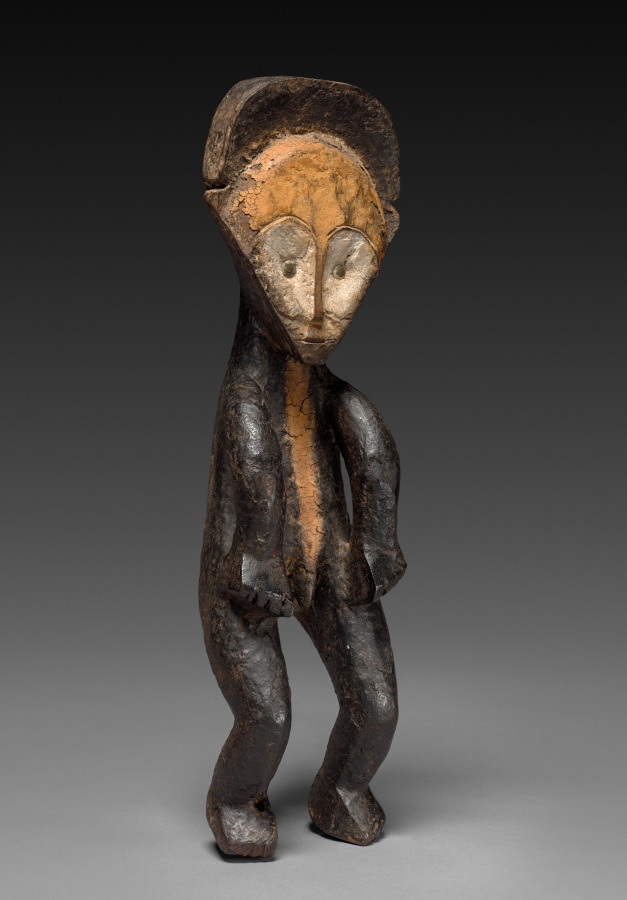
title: Male Figure (Ofika)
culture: Africa, Central Africa, Democratic Republic of Congo, Mbole-style carver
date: late 1800s or early 1900s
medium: Wood, colorant, and upholstery studs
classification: Sculpture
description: Figures such as this, known as ofika, were central to the initiation practices and the enforcement of laws among the all-male Lilwa association, a hierarchical organization that served educational, judicial, political, economic, and ritual functions among the Mbole. Meant to instill a moral code and to act as a cautionary symbol during initiation for Lilwa novices, ofika figures are believed to represent criminals who were ritually hanged for transgressions against Lilwa laws. The figure’s encrusted surface imitates how members covered their bodies with a substance made of ashes and palm oil during burial rites.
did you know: The stripe painted down the figure's torso represents the cord used for execution.